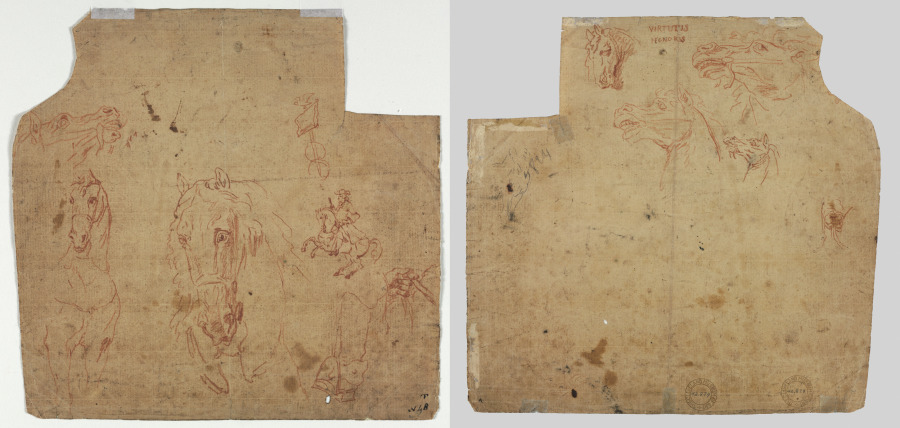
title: Sketches of Horses and Riders (recto); Sketches of Horses (verso)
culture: Flanders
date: 1600s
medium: red chalk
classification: Drawing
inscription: recto: lower right, in graphite: 9 ; lower right, in brown ink: T / N48 [written over the "9"] verso: upper center, in red chalk: VIRTUTJS / HONORJS ; left center, in graphite: 814 ; lower right, in graphite: [illegible, beneath CMA stamp] 3 3 / [9?]